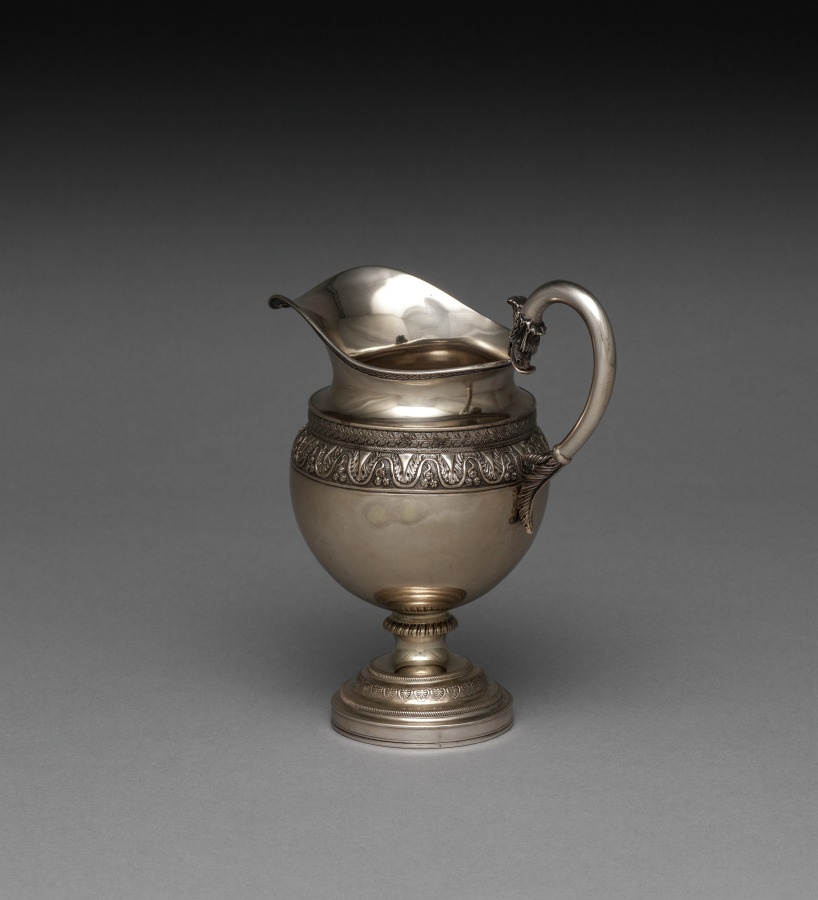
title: Cream Jug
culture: America, Pennsylvania, Philadelphia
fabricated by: Harvey Lewis (American, 1835)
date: c. 1811–25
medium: silver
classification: Silver